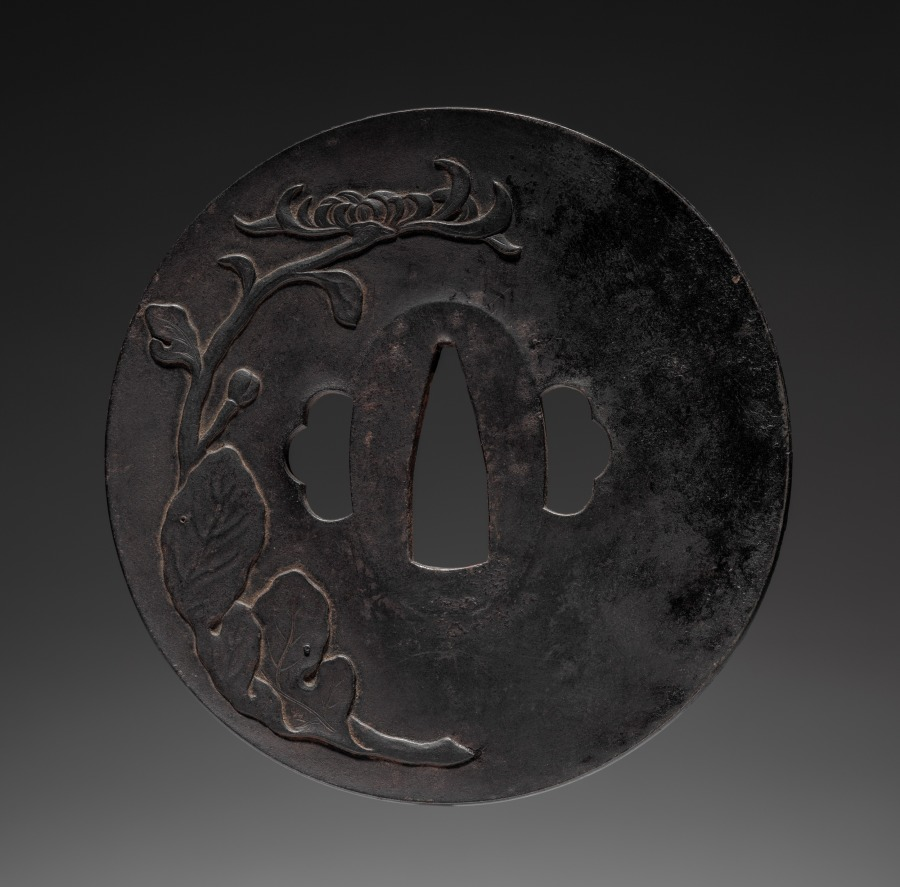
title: Sword Guard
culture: Japan, Edo period (1615–1868)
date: mid-1800s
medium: iron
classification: Arms and Armor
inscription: signed "Ozawa Inaba."